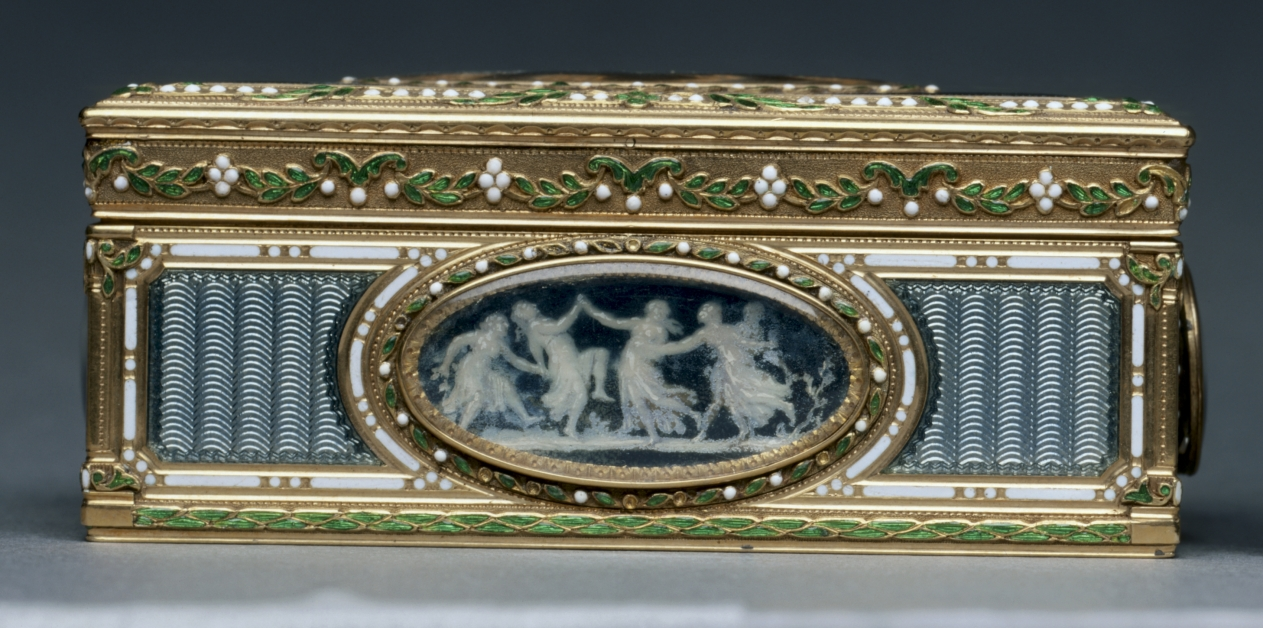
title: Snuff Box (Tabatière)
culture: France, 18th century (style of Louis XVI)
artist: François Chazeray (French)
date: 1777–78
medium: gold and enamel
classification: Metalwork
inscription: [Maker's mark of François Chazeray, master goldsmith in 1760, cover; bottom; front wall]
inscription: [Warden's mark (probably a crowned "O"), Paris, 1777-1778, cover; bottom; front wall]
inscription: [Illegible mark, bottom]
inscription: [Illegible mark, cover]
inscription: [Illegible charge mark, inside front]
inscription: [Discharge mark of Jean-Baptiste Fouache, Paris, 1774-1780, on neck at left.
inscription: [Outside of neck, modern inscription '4 (modern inscription]:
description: This box is decorated with figures of antiquity associated with love: winged cupids, dancing nymphs, and representations of the Greek goddess of love. These scenes are inspired by antique cameos, intricately carved gemstones crafted in ancient Greece and Rome. This interest in ancient iconography, symmetry, and classical compositions of gods and goddesses was characteristic of 18th-century neoclassicism.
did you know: Decorated with allegorical scenes of love, it is likely that this box was a present between lovers.